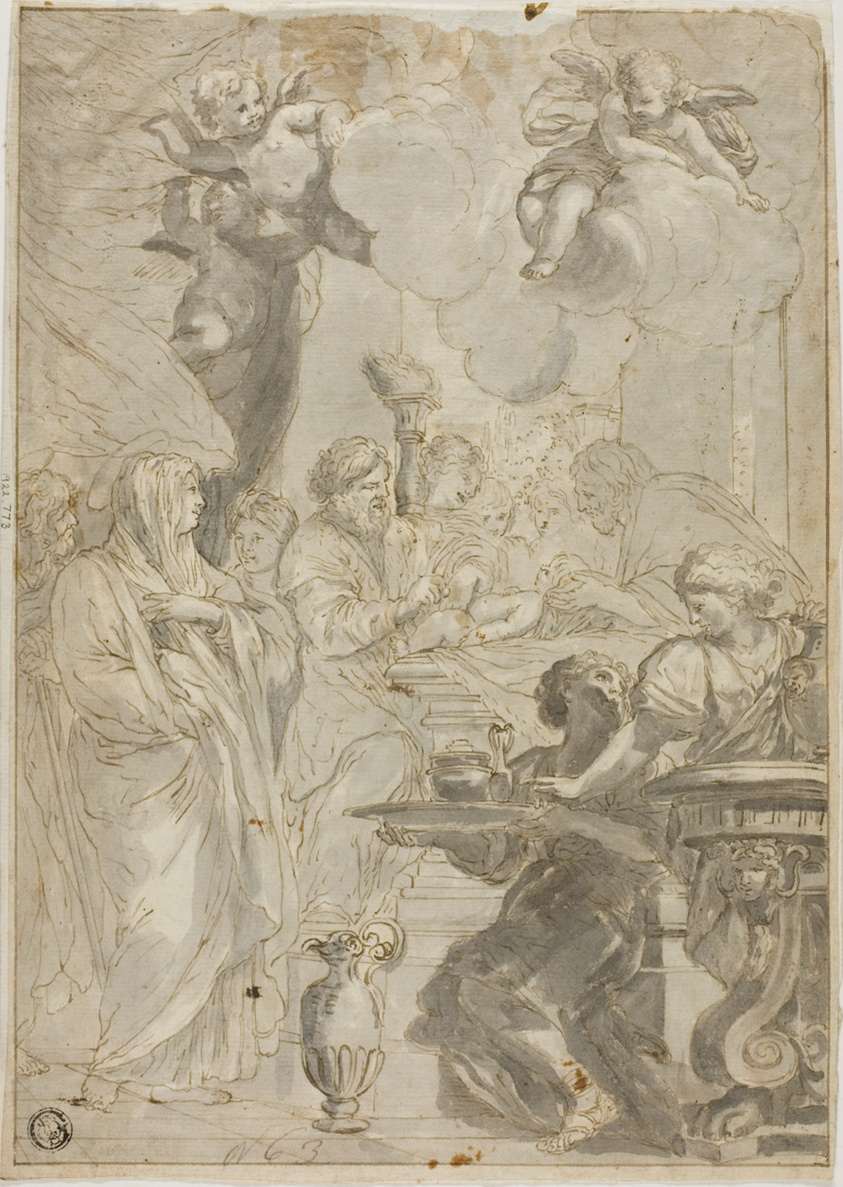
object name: Drawing and Watercolor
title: Sculpted Female Head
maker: Ciro Ferri (Italian, 1634-1689)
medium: Black chalk heightened with white chalk, on blue laid paper, laid down on ivory laid paper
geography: Italy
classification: drawings (visual works); prints and drawing